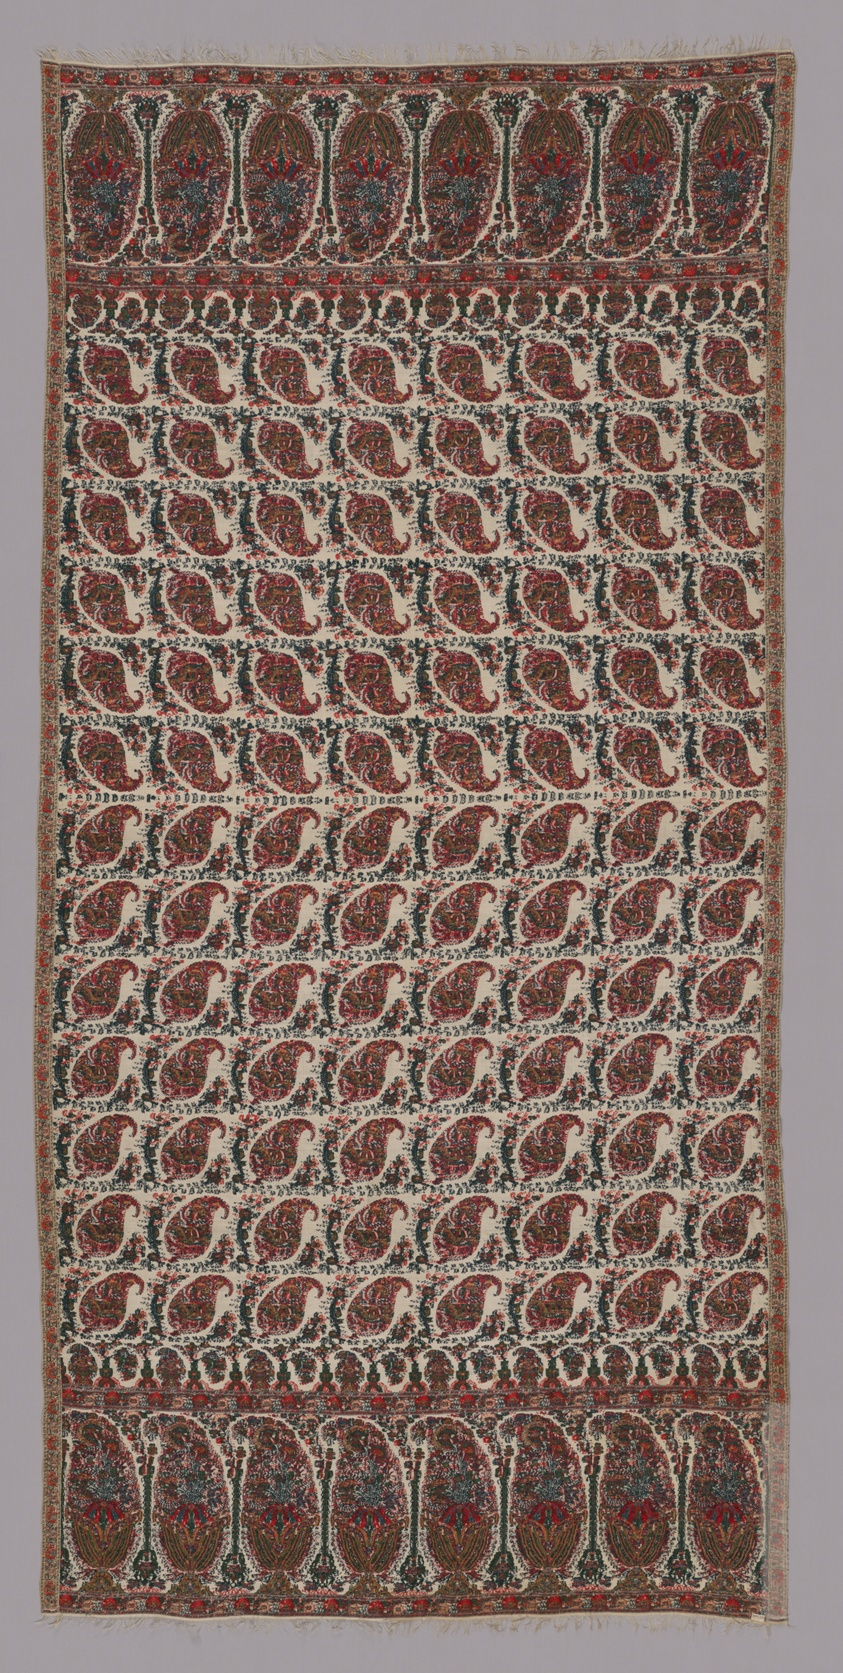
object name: Costume and Accessories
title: Woman's Long Shawl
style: 19th century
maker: Probably Norwich, England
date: 1820s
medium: Silk, cotton, and wool, warp-float faced 3:1 'S' twill weave with supplementary patterning wefts bound in weft-float faced 1:3 'S' twill interlacings; attached side borders of 2:2, 2:2, 1:3, 2:2...'Z' composite twill weaves with supplementary patterning wefts bound in weft-float faced 1:3 'Z' twill interlacings; main warp fringe; woven on loom with Jacquard attachment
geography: Norwich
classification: textile; weaving; costume; costume - weaving; costume accessory; garment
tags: paisley, flowers, floral, vines